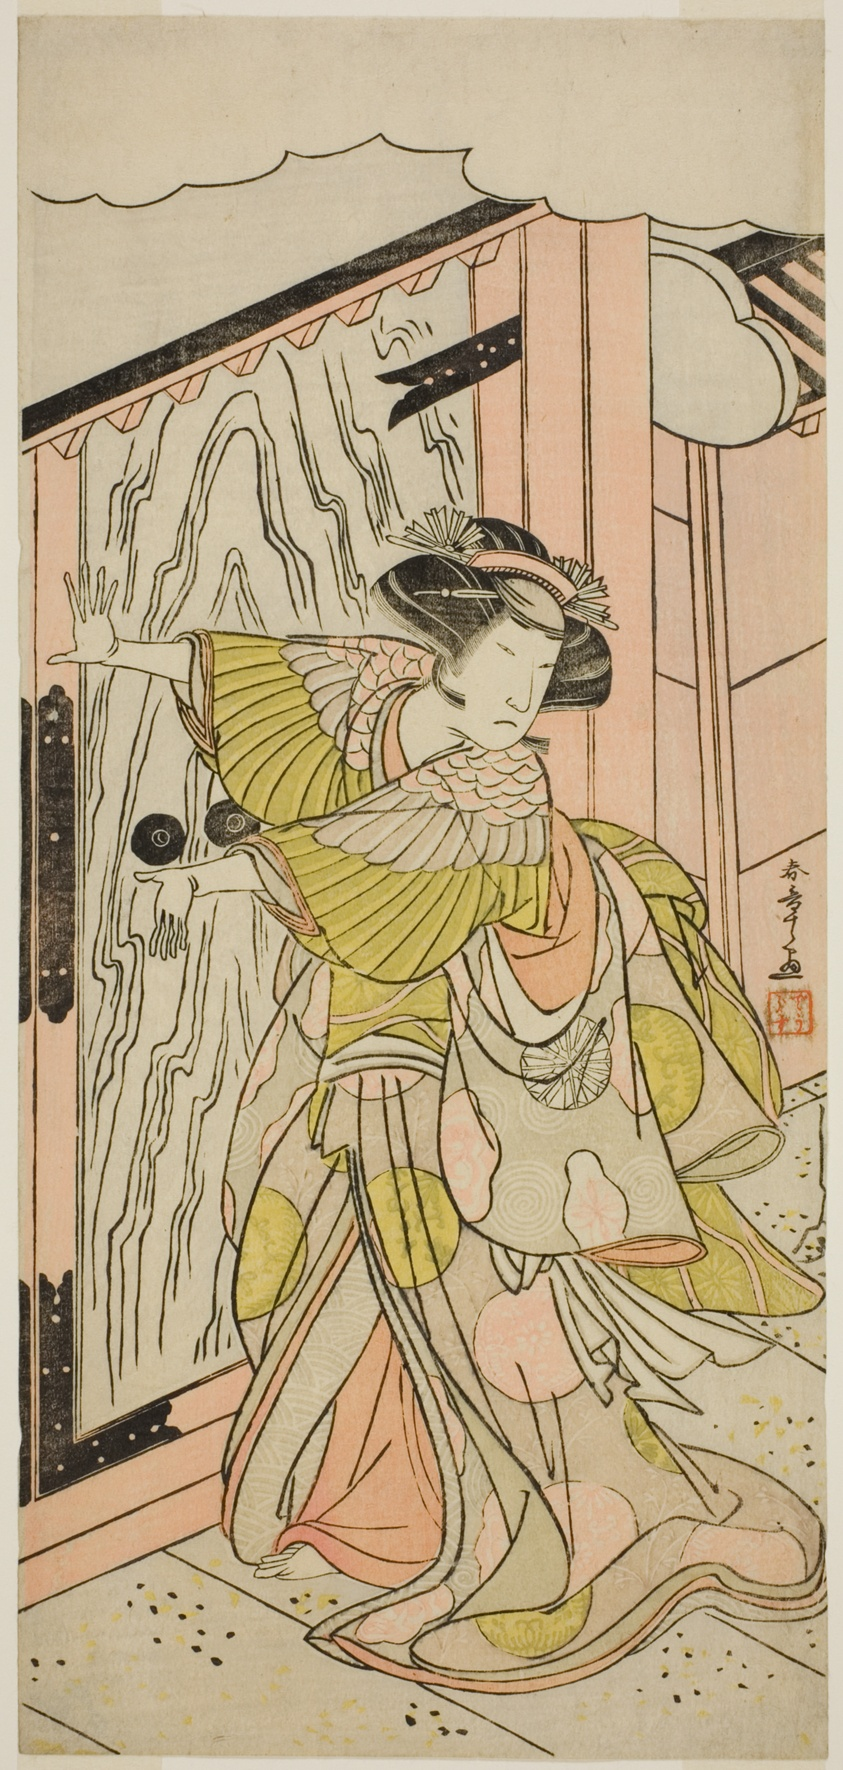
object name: Print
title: The Actor Nakamura Tomijuro I as Lady Hangaku (Hangaku Gozen) in the Play Wada-gassen Onna Maizuru, Performed at the Nakamura Theater in the Seventh Month, 1777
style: Japanese (culture or style)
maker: Katsukawa Shunsho 勝川 春章; Japanese, 1726-1792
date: c. 1777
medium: Color woodblock print; hosoban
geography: Japan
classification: woodblock print; print; asian art